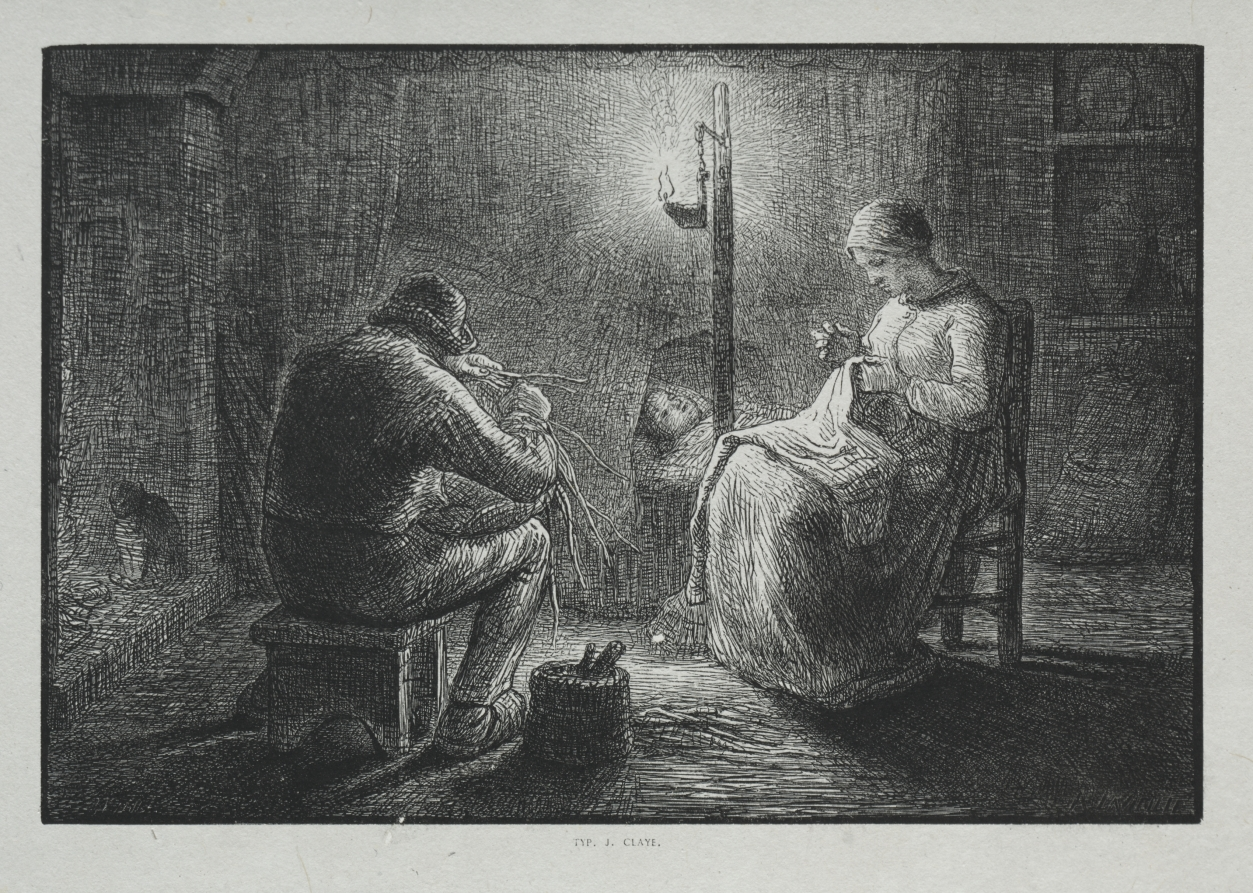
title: Four Hours of the Day: Night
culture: France, 19th century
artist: Adrien Lavieille (French, 1818–1862)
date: 1860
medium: wood engraving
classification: Print